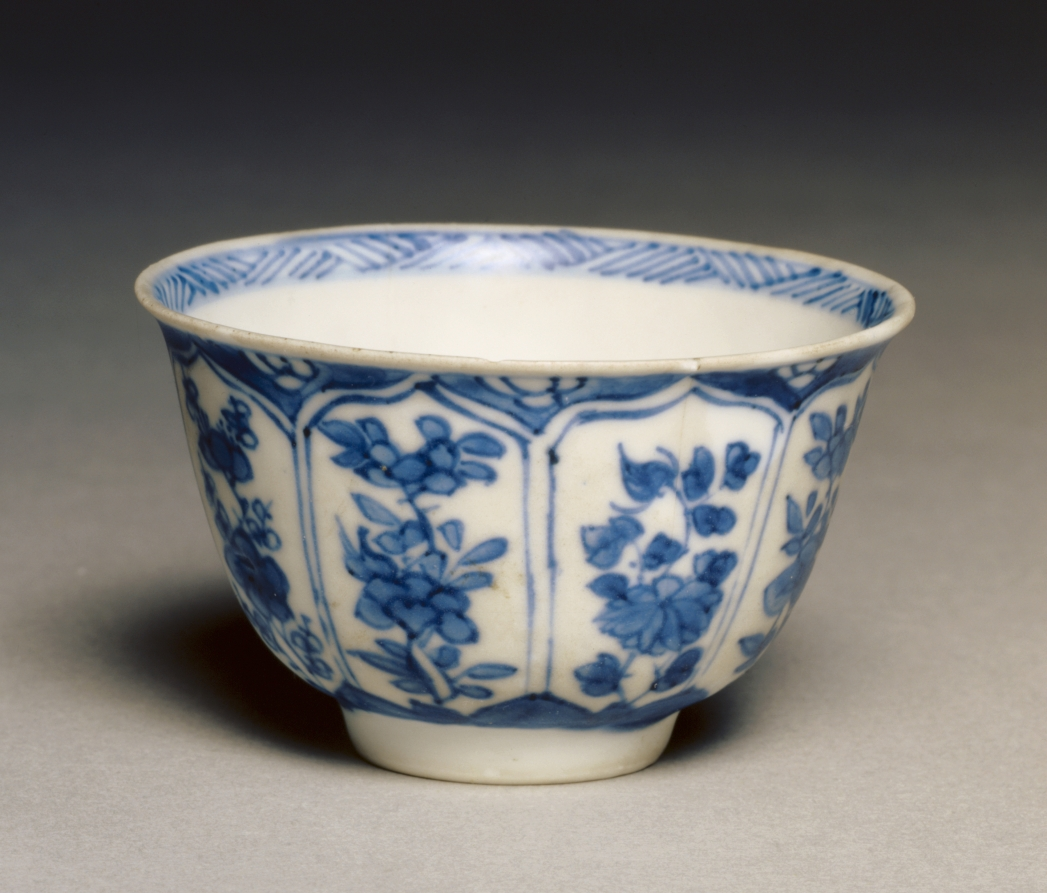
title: Tea Cup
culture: China, Qing dynasty (1644-1911)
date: c. 1690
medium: porcelain with blue and white decoration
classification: Ceramic